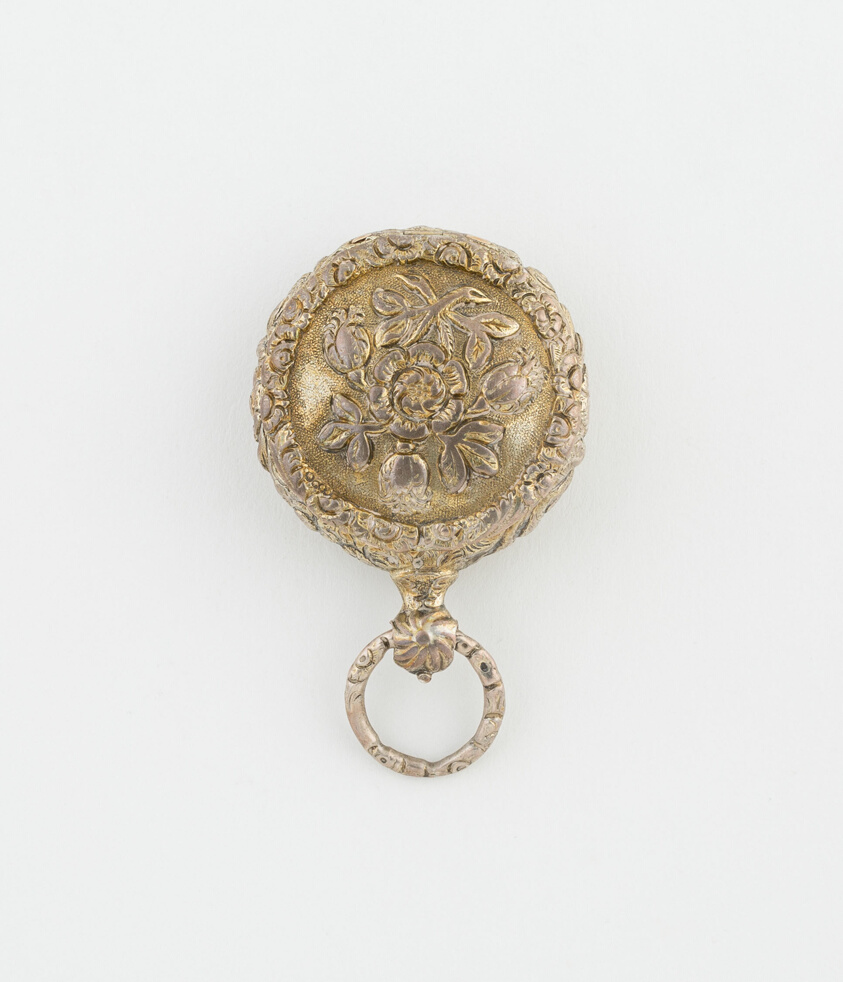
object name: Metalwork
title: Watch-Shaped Vinaigrette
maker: Joseph Willmore; Birmingham, England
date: 1824/25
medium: Silver and silver gilt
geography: Birmingham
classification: container for personal use; vinaigrette (container for health care); european decorative arts; metalwork; silver; decorative object/ornament